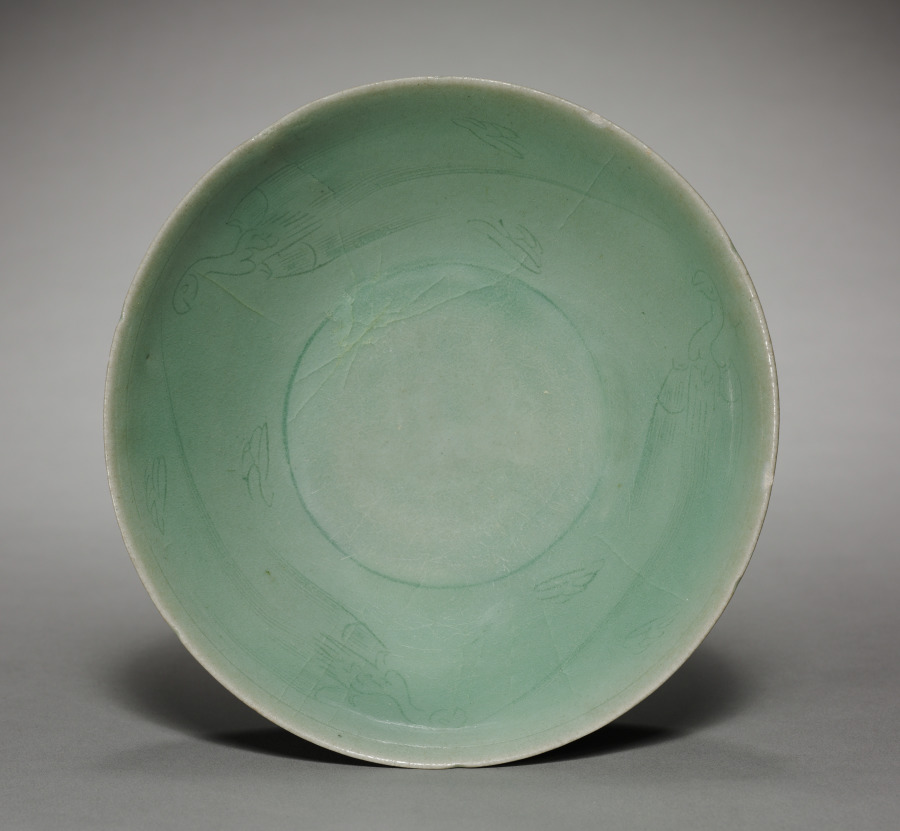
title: Bowl with Incised Parrot Design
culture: Korea, Goryeo dynasty (918–1392)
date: 1100s–1200s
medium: celadon ware with incised decoration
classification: Ceramic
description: A wide bowl like this example was especially suitable for drinking powdered tea shaved from a compressed tea cake, the most commonly enjoyed type during the Goryeo period. The image of flying parrots incised on the inner wall of this tea bowl must have made the moment of drinking tea more enjoyable and even magical.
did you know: As early as the seventh century, the practice of drinking tea and wine became an important part of elite leisure culture in Korea.